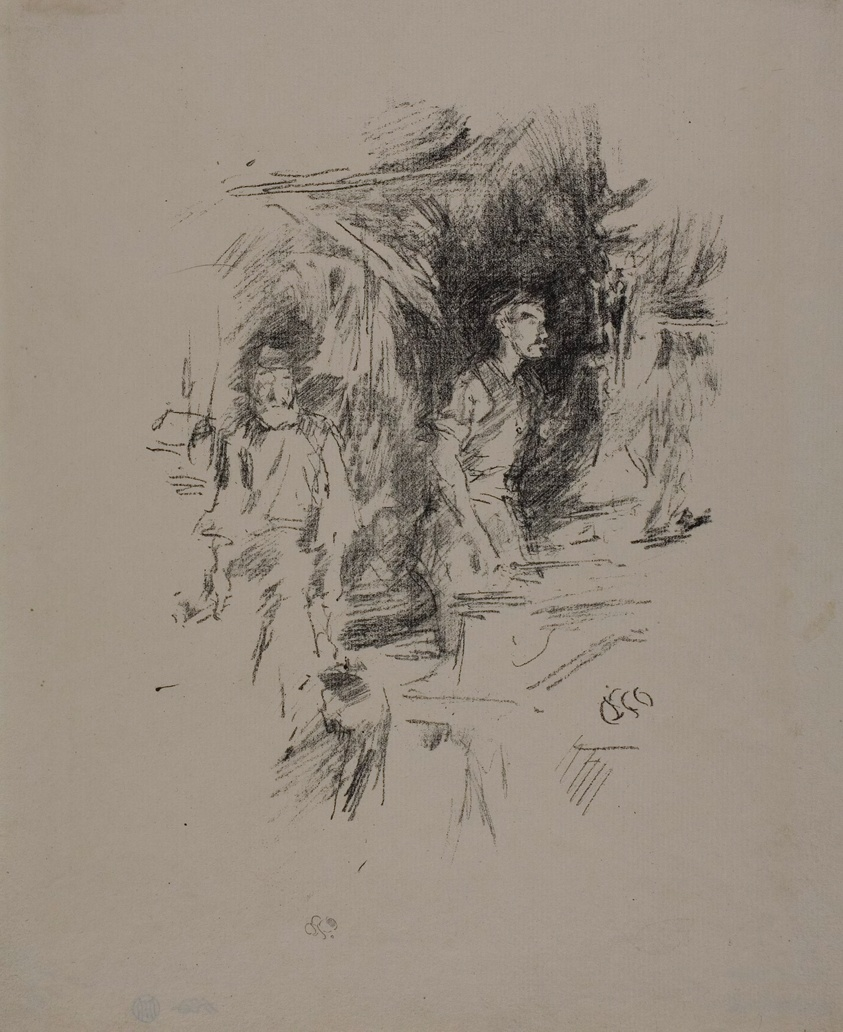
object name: Print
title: The Old Smith's Story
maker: James McNeill Whistler (American, 1834-1903)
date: 1895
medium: Transfer lithograph in black on cream laid paper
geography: United States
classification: transfer lithograph; lithograph; print; prints and drawing; paper